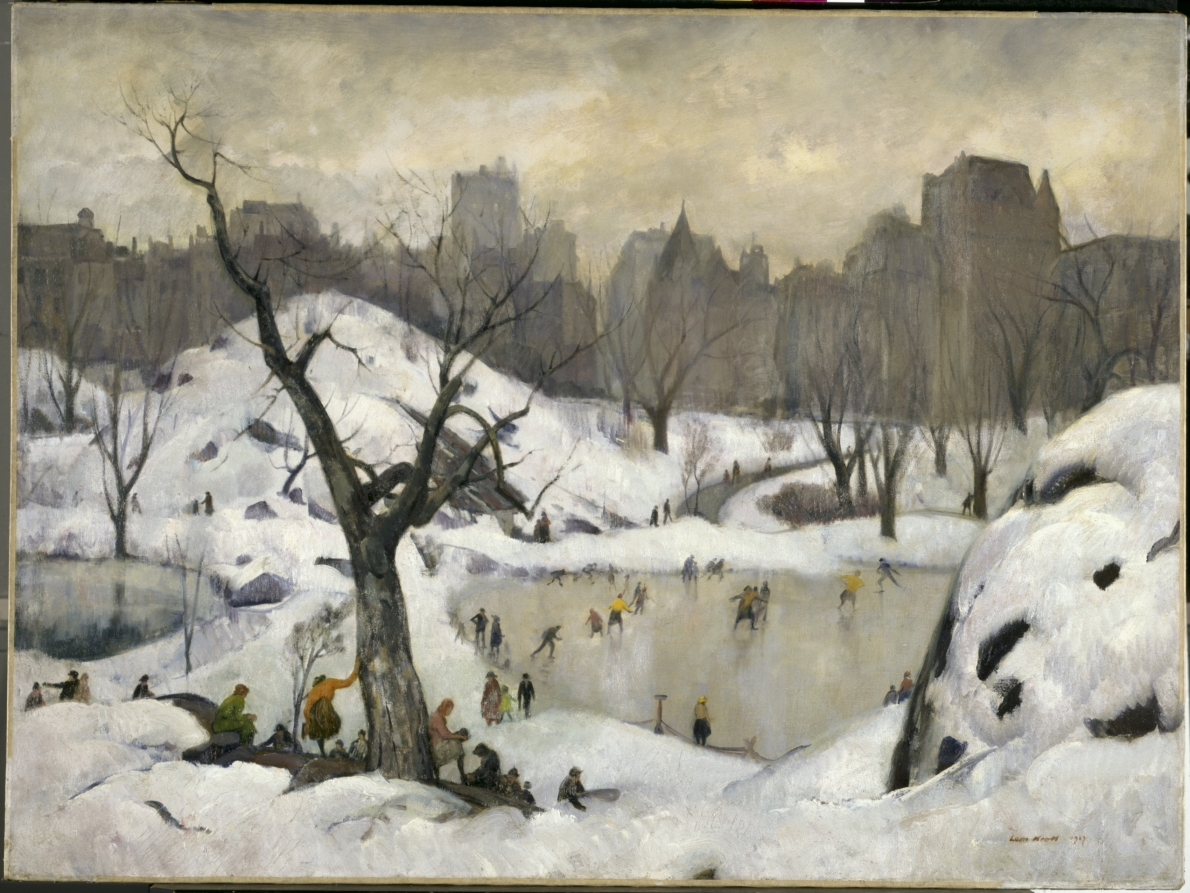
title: The Park-Winter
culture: America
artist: Leon Kroll (American, 1884–1974)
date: 1923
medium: oil on canvas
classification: Painting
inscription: signed lower right: Leon Kroll 1923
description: During the 1920s, Kroll earned a great deal of success painting scenes of everyday urban life. In this example, he depicted ice skaters on a pond in snow-covered Central Park, with a looming skyline of Manhattan apartment buildings in the background.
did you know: A fellow artist described Leon Kroll as having "the eye of a hawk and the heart of a dove."